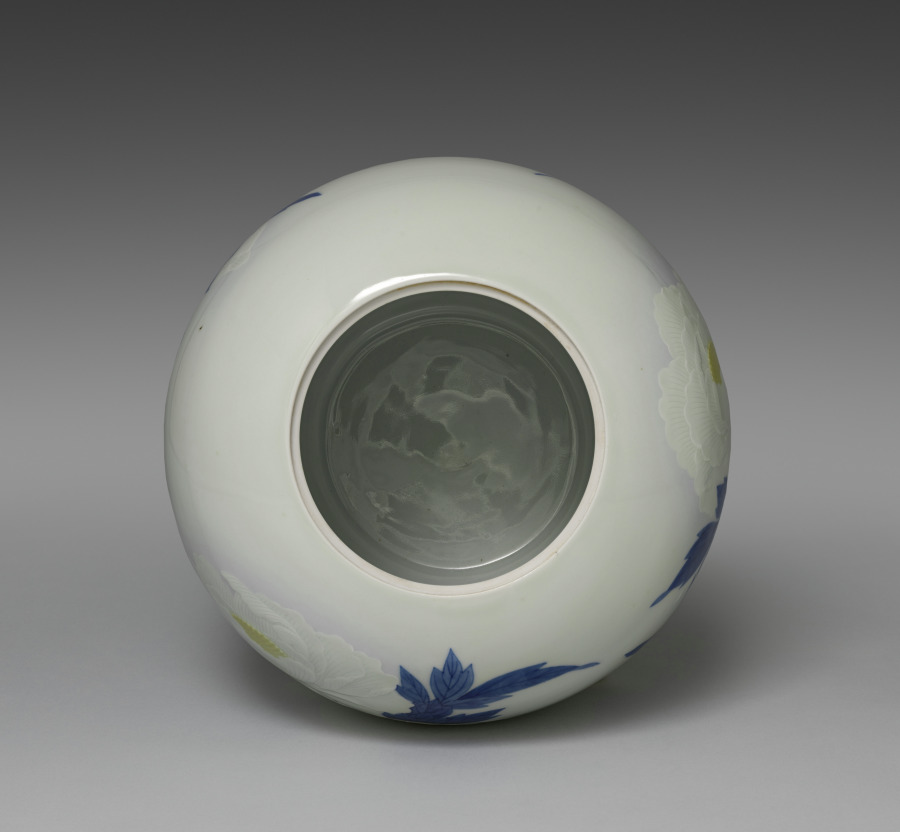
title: Jar with Peonies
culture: Japan, Meiji period (1868–1912)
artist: Seifū Yohei III (Japanese, 1851–1914)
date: 1897–1912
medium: Porcelain with underglaze blue, overglaze color enamel, molded decoration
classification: Ceramic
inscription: 大日本清風造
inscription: 金聲玉振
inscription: 帝室技芸員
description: The petals of the large, white peonies on this jar were made by applying molded clay to the body and incising the clay with lines for definition. The flowers’ centers were then painted with yellow, along with the leaves in cobalt blue line and wash. A subtle blue gradation was also added all around the flowers using a masking method. The lid, with its treasured jewel-shaped finial, was also decorated with foliate motifs in underglaze cobalt blue. Finally, a transparent glaze was applied over the entire body of both the jar and lid. It is a special demonstration of Yohei III’s use of precision and control to create a completely balanced composition.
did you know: Though Seifū Yohei III originally studied painting, he ultimately succeeded his ceramics mentor, Seifū Yohei II (1845–1878), in Kyoto.